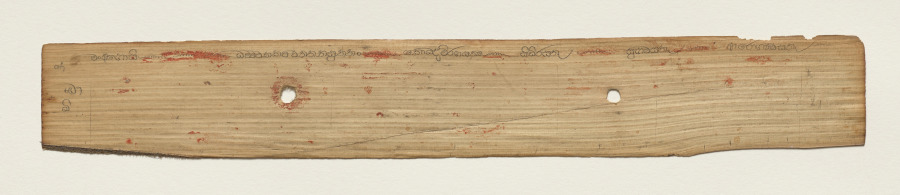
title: Leaf from a Buddhist Manuscript (recto)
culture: Sri Lanka, Singhalese, Late 17th century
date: c. 1700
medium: fiber paper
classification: Manuscript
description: Palm leaf material is still used for manuscripts in Sri Lanka. The palm leaves are prepared first by boiling them, drying them in the sun, and then rubbing them with oils. Scribes then use a metal stylus to incise the text. Then charcoal powder is wiped across the pages, filling in only the inscribed lines.